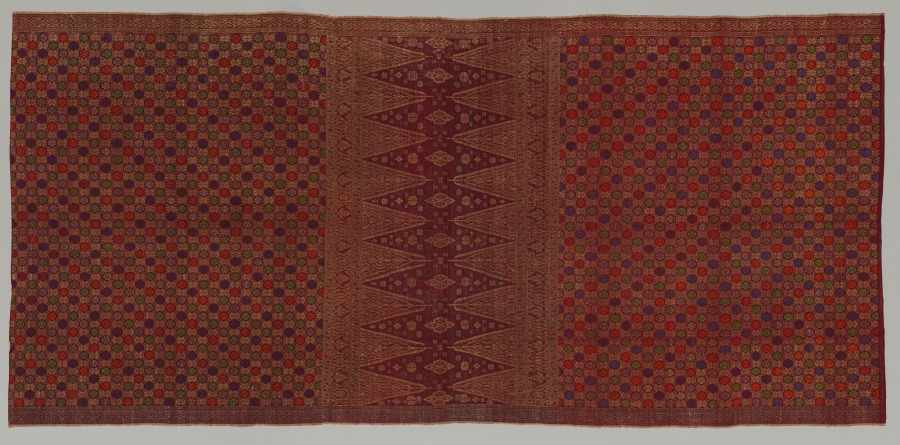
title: Wearing Cloth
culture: Indonesia, Sumatra, Palembang, 1st half 20th century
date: 1900–1950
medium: tabby weave; silk brocaded with silk and metallic threads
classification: Textile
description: The small pattern of rosettes in the main field, the selvage borders, and the tumpal (triangle) border are characteristic of the gold, silver, and red silk cloths woven in the Palembang region. Sumptuous silks of this type were only made in the eastern coastal cities of Sumatra that maintained active trade with China and India. Not only were the silk, gold, and silver threads imported, but the elements of the design were derived from Indian patola (warp and weft ikat) silks. Traditionally, cloths like this were worn for ceremonial occasions and were also used in the exchange of gifts required on the occasion of a wedding.